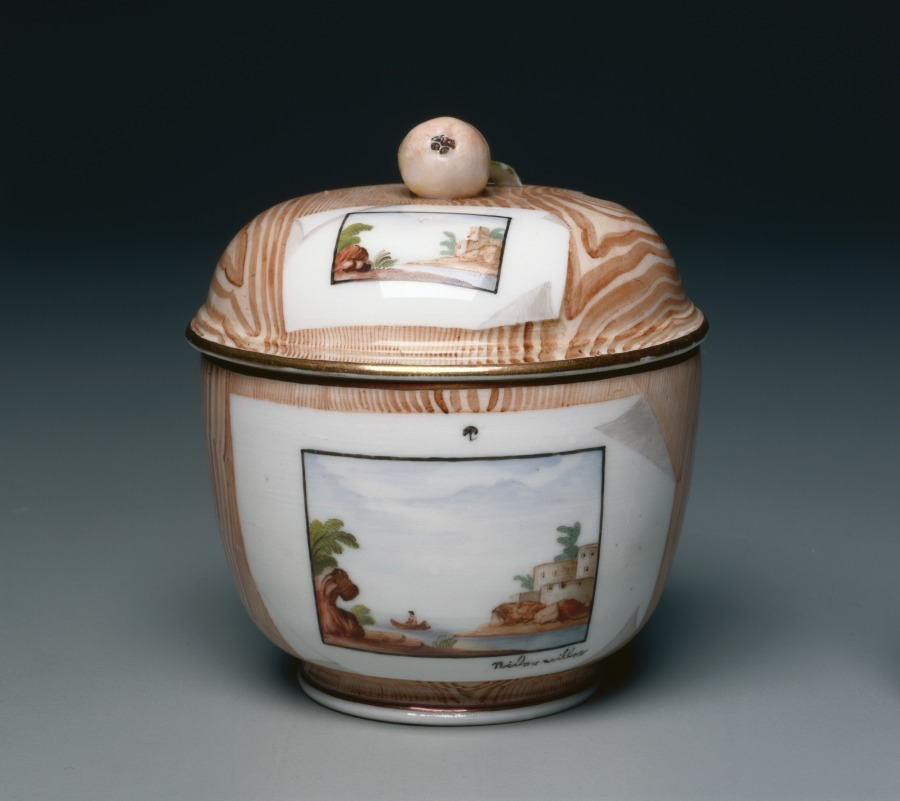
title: Covered Bowl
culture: France, 18th century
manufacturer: Niderviller Factory (French)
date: c. 1775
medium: Hard-paste porcelain with enamel and gilt decoration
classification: Ceramic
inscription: [Inscribed at lower right corner of two trompe l'oeil prints]: "Niderville"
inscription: [Interlaced 'CC', in black]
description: This covered bowl is decorated with pieces of paper painted in trompe l’oeil, an effect that gives two-dimensional surfaces the illusion of extending into three-dimensional space, on a faux bois, or fake wood, background. This unique style of decoration was likely invented at Niderviller, but taken up by other European porcelain factories including those at Locré, Vienna, and Tournai.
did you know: Established in 1749, the Niderviller porcelain factory remained in operation following the 1789 French Revolution, though its owner, Adame Philippe, count of Custine, was executed in August of 1793.